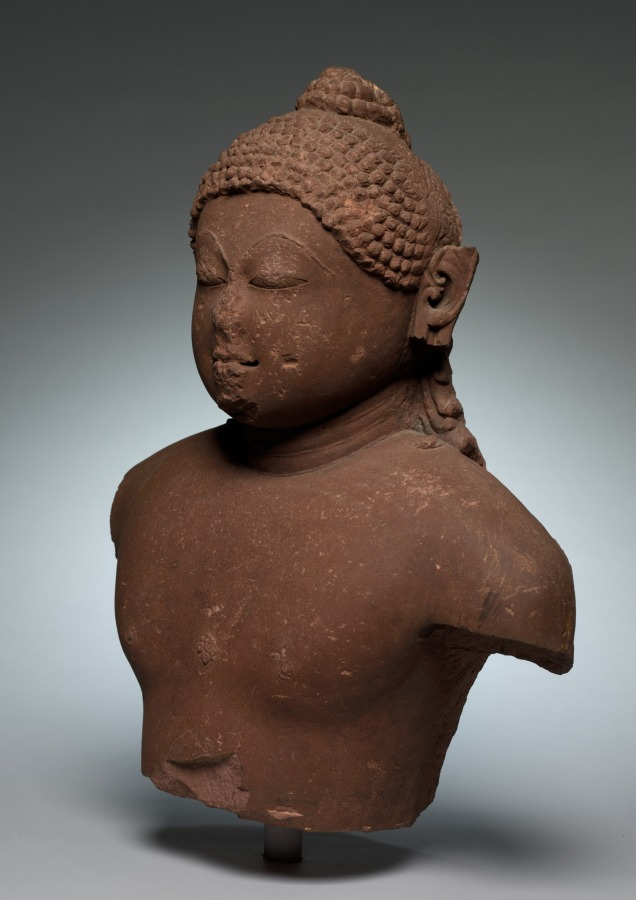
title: Rishabha, the First Jina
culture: Central India, Chandela Dynasty, 9th - 10th Century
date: 800s–900s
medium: stone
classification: Sculpture